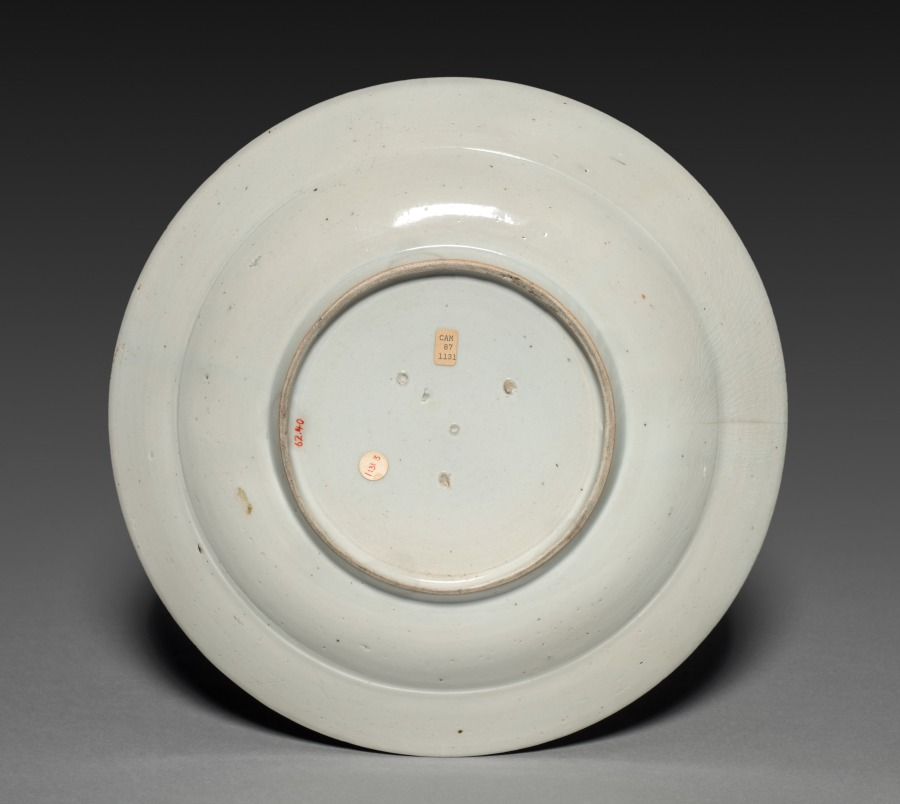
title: Dish with Birds and Flowers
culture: Japan, Edo period (1615–1868)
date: late 1600s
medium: porcelain with overglaze color enamel (Hizen ware, Kakiemon type)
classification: Ceramic